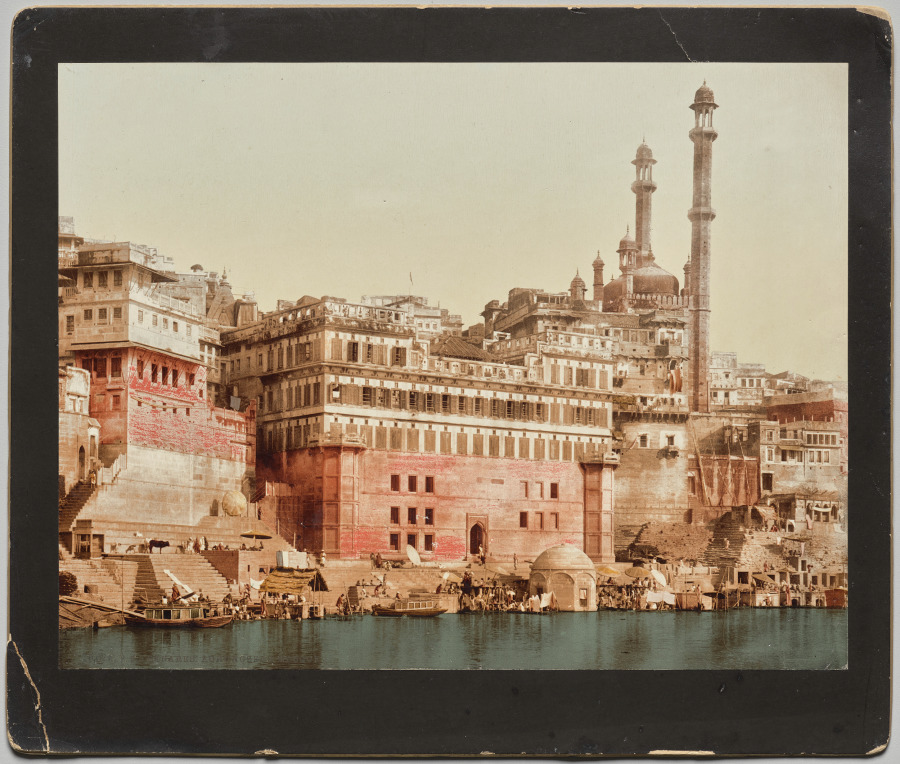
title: India. Benares. Aurangzeb's Mosque, after a photo by Dr. Kurt Boeck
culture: India, 19th century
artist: Photoglob Co. (Zurich, active c. 1890–1910)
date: c. 1890–1910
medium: Photochrom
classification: Photograph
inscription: Imprinted in type on recto: “20.026.P.Z.-BENARES.AURUNGZEB’S MOSQUE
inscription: Written in pencil on verso of mount: “5 (circled and scribbled out)/1 (circled) GUR AUPP”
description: The sixth Mughal emperor Aurangzeb, a very pious Muslim, had this enormous mosque built in a blend of Islamic and Hindu architectural styles. It was constructed in the late 17th century on the site of one of the most sacred ancient Hindu temples in the city of Varanasi (formerly Benares).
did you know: The Taj Mahal was created as a tomb for Aurangzeb’s mother.